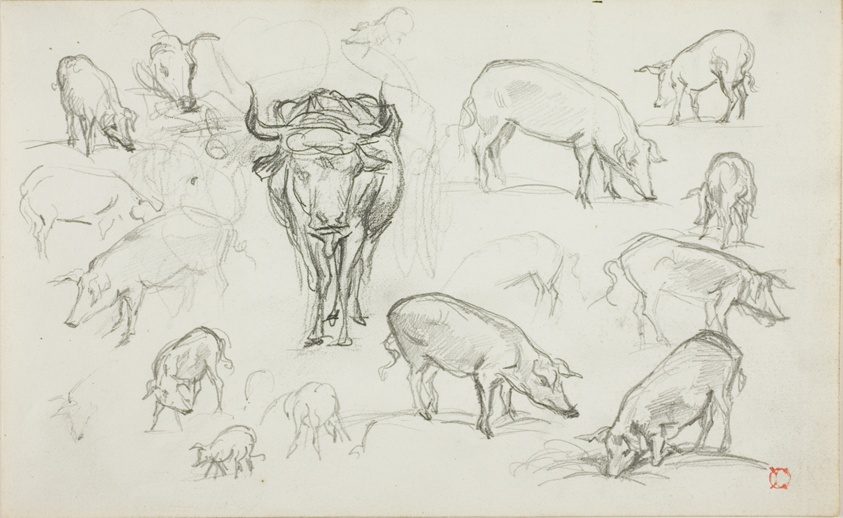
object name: Drawing and Watercolor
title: Sketches of Swine and an Ox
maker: Charles François Daubigny (French, 1817-1878)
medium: Graphite on ivory wove paper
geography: France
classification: graphite; drawings (visual works); prints and drawing